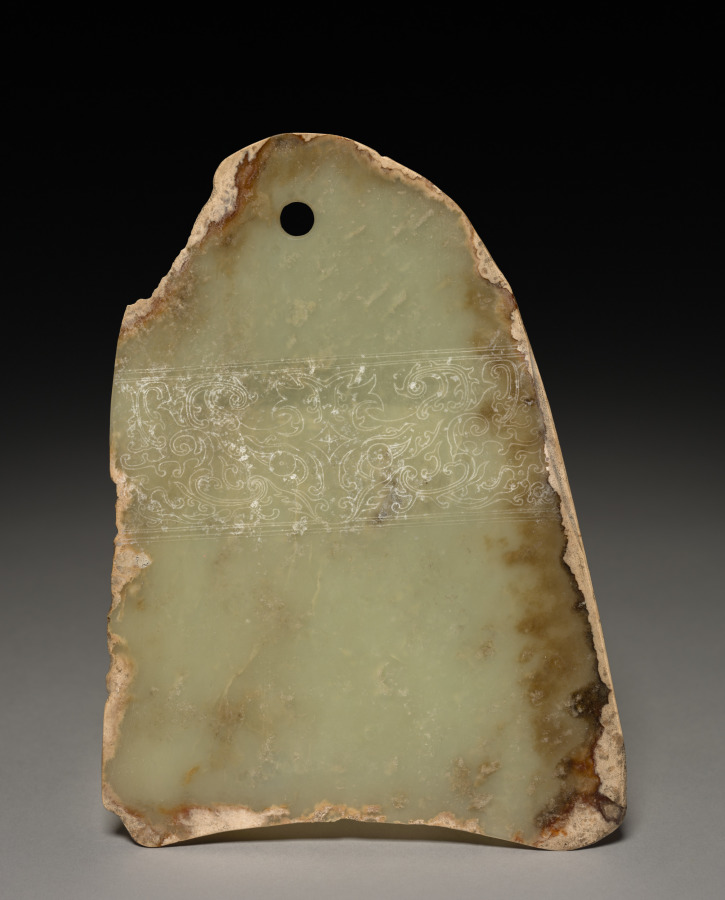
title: Blade Incised with Animal Masks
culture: China, Song dynasty (960-1279)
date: 960– 1279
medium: jade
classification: Jade